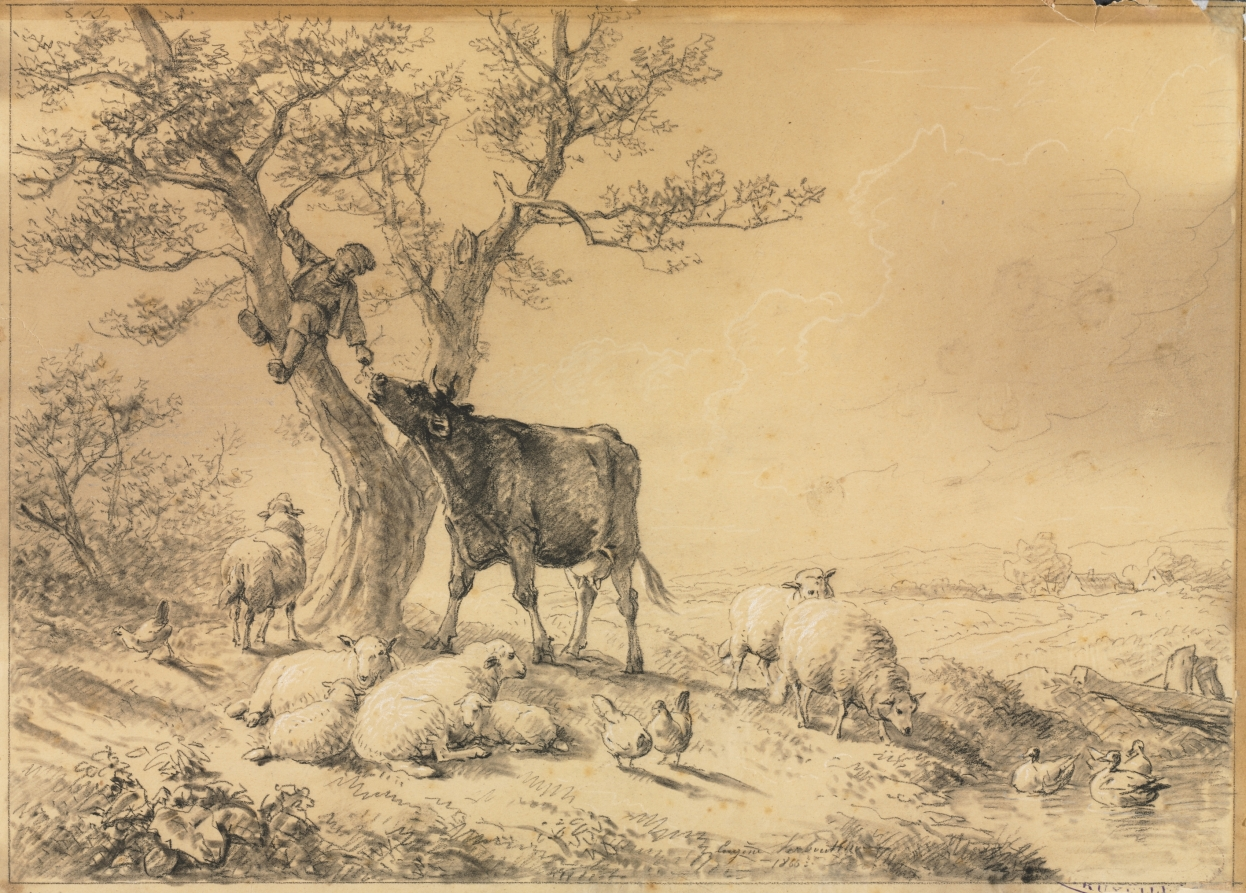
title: Landscape with Animals and Boy in Tree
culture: Belgium, 19th century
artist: Eugène Joseph Verboeckhoven (Belgian, 1798–1881)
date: 1866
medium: black chalk or crayon (extended with water in places) and brush and gray and black wash, heightened with white chalk; framing lines in black chalk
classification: Drawing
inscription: signed, lower center, in charcoal (strengthened with graphite): Eugène Verboeckh[oven] / 1866. ; lower left, in graphite: [illegible, cropped] ; VERSO OF SECONDARY SUPPORT, lower right, in graphite: 208